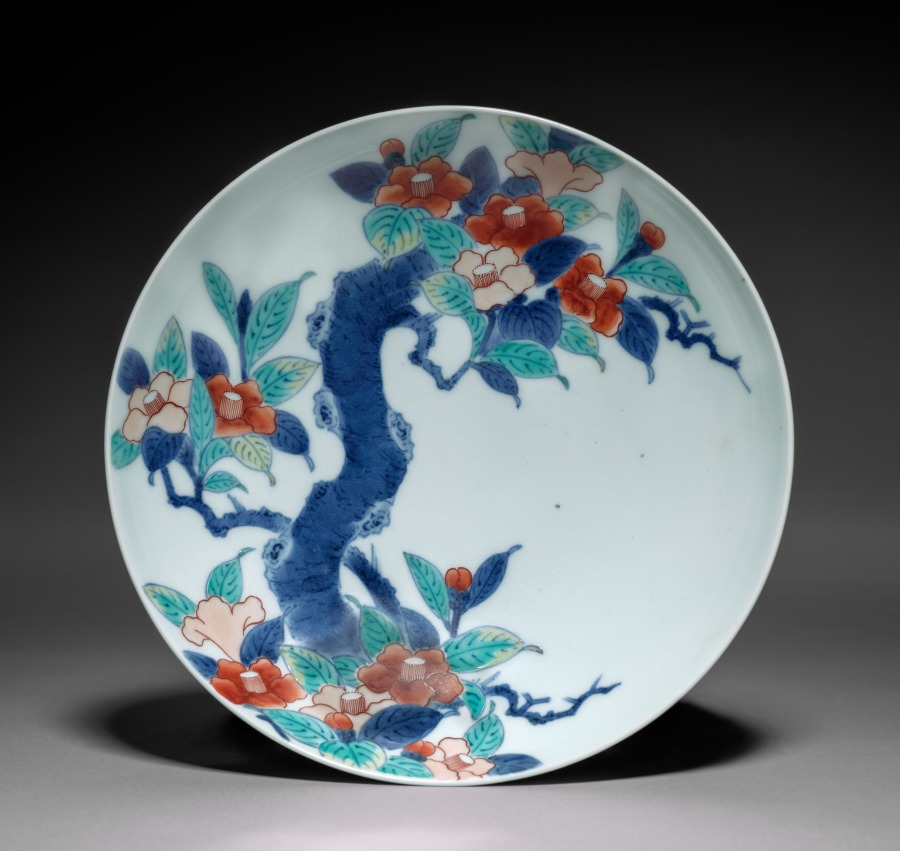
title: Dish with Camellia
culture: Japan, Edo period (1615–1868)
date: c. 1688–1716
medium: Porcelain with underglaze blue and overglaze color enamel (Hizen ware, Nabeshima type)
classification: Ceramic